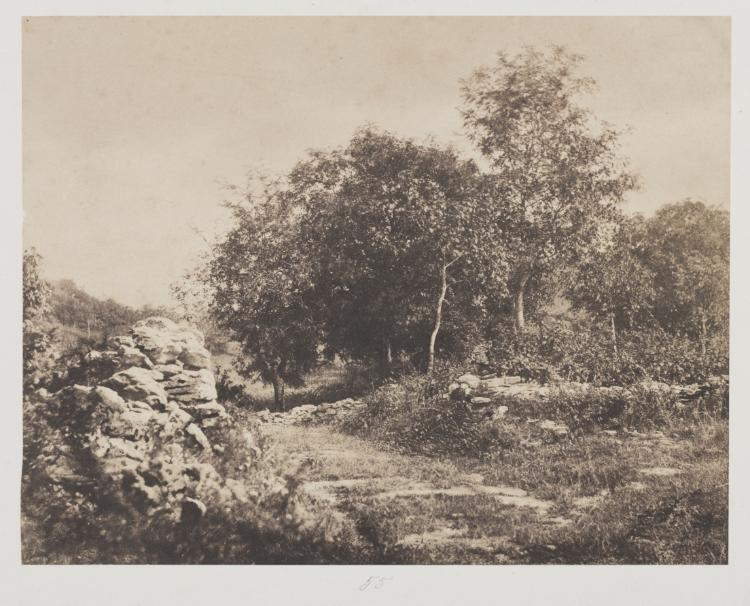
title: Untitled (Scene of Fontainebleau)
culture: France, 19th century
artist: André Giroux (French, 1801–1879)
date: c. 1853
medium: salted paper print from waxed paper negative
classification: Photograph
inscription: Written in pencil on recto: "55"; [a second mark is illegible]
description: Trained as a painter, Giroux was an active amateur photographer during the 1850s. His father manufactured equipment for Louis-Jacques-Mandé Daguerre, the inventor of the first photographic process, the daguerreotype. In this early example of his appealing landscape work, Giroux focused on a scene in the Forest of Fontainbleau, a favorite locale for 19th-century French artists. Inspired by the compositions of paintings and lithographs, he carefully framed an engaging, asymmetrical arrangement of rocks, trees, and a primitive pathway. This brilliantly lit wooded environment projects a feeling of peace and harmony, order and balance.